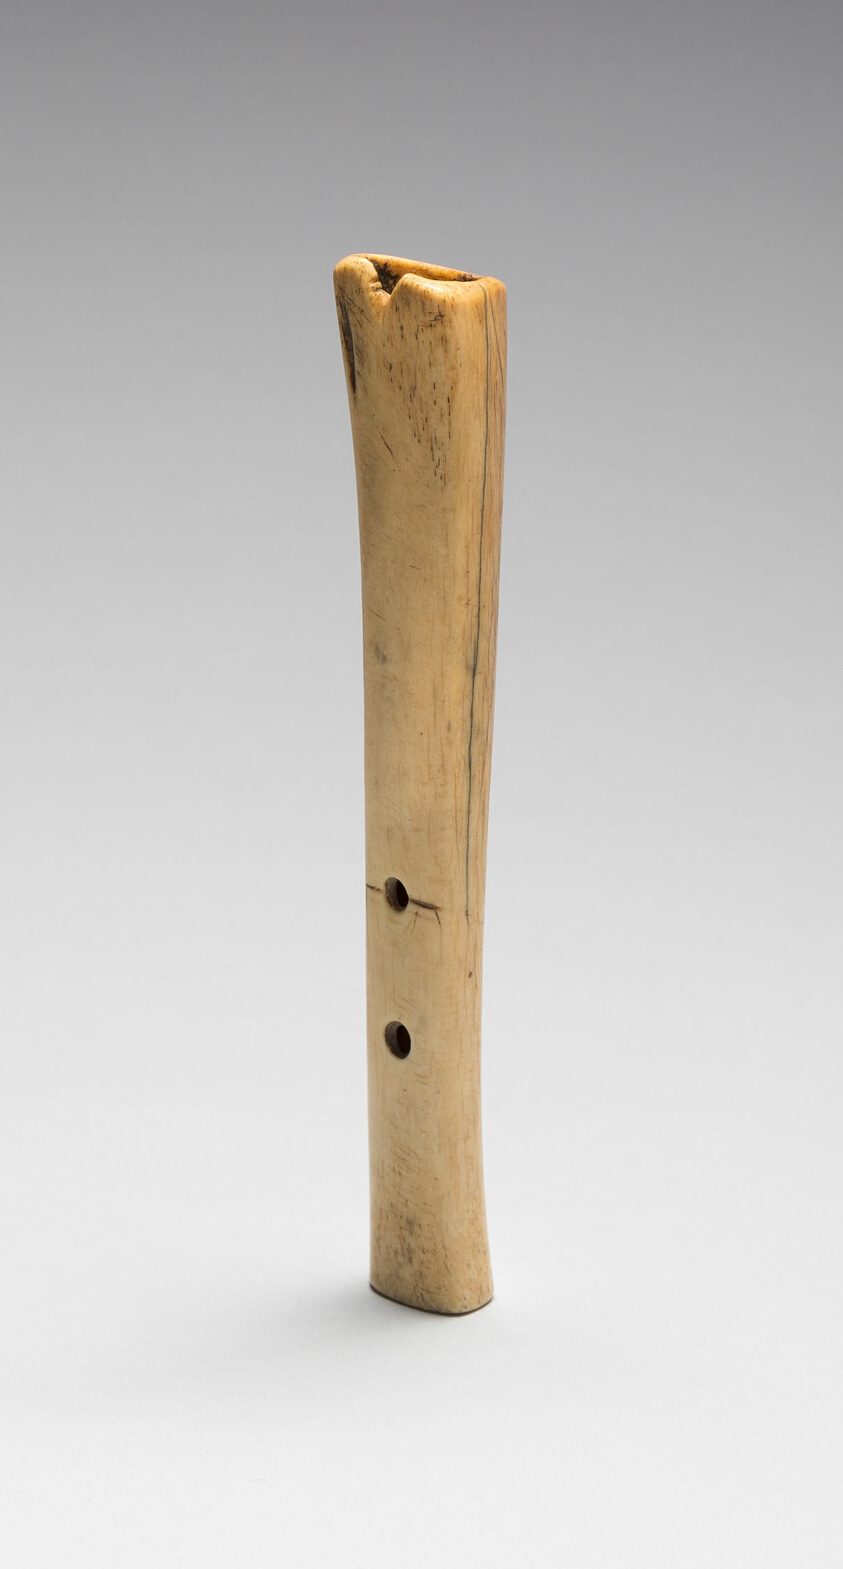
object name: Decorative Arts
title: Flute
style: nazca, Arts of the Americas, andes, south american, andean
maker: Nazca; South coast, Peru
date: 180 BCE–500 CE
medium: Bone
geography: Peru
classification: bone; american decorative arts; art of the americas; musical instrument; decorative arts